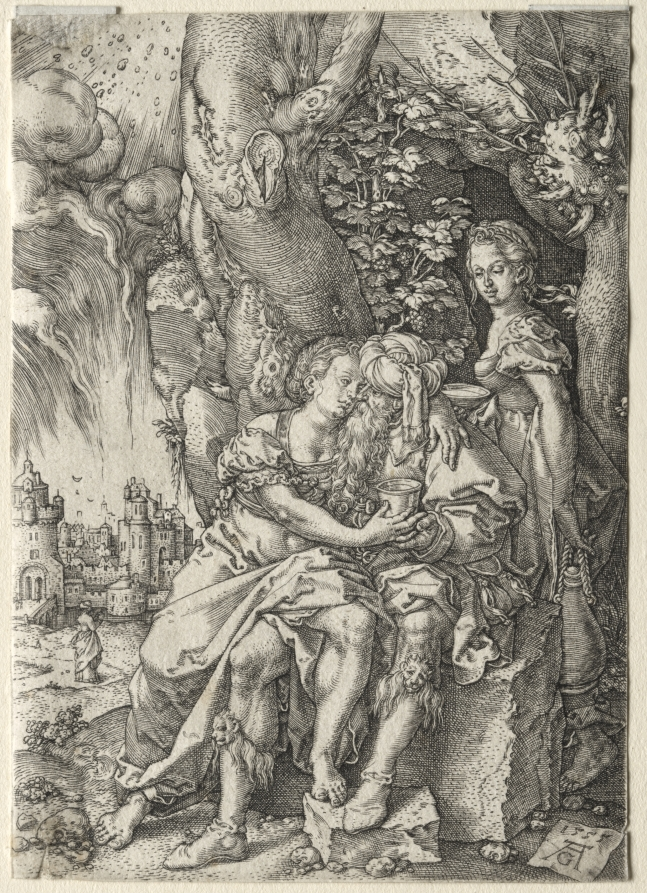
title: The Story of Lot: Lot with His Daughters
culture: Germany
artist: Heinrich Aldegrever (German, 1502–1555/61)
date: 1555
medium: engraving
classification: Print